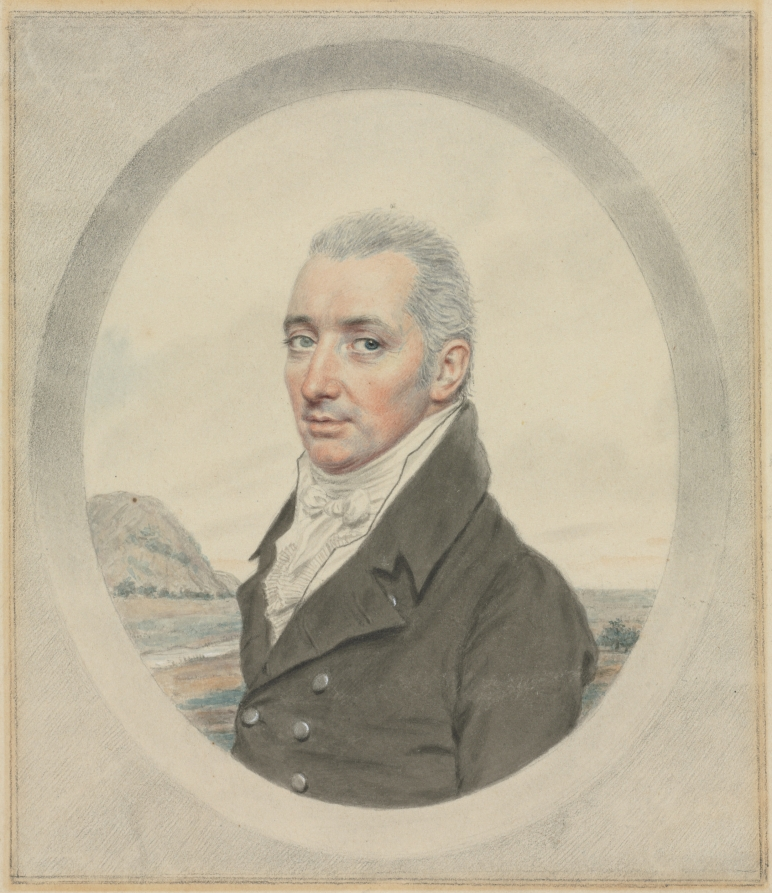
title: Portrait of General Keith MacAlister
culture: England, 18th century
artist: John I Smart (British, 1741–1811)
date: c. 1800–1810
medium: watercolor and graphite, heightened with traces of white gouache, on paper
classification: Portrait Miniature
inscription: across bottom, in graphite: Genl Macalester ; VERSO, center, in graphite: 169; lower left, in graphite: l. 159. [circled]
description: Although it is impossible to say if it was always part of the artist’s process to execute a preparatory sketch prior to painting each miniature, we do know that John Smart retained many hundreds of these sketches. A great number were inherited by his son John James Smart, who in turn left them to his daughter Mary Ann Bose. Upon her death in 1934, they were divided between three of her children: William Henry Bose, Lilian Dyer, and Mabel Annie Busteed. General MacAlister is represented in three-quarter view, bust length, and facing the right. His eyes are blue, but the right eye is clouded and lighter in color than the left. There is no sign of isolated damage or fading, confirming that this color difference was among MacAlister’s physical attributes. He wears a brown coat; white, frilled vest edged in black; tall collar; and a white cravat tied in a bow. His closely cropped hair is powdered, and an unidentified rocky landscape through which a small river runs is painted in the background; it probably represents a place of personal significance in Scotland or India, possibly even Seringapatam and the Cauvery River. Smart depicted MacAlister inside of a penciled oval tromp l’oeil frame. The drawing is replete with physically informative details and is larger and more finished than drawings intended to function exclusively as preparatory sketches, though it may also have served this purpose. Beneath the elaborate penciled border is written in large graphite script “Genl Macalester.” This inscription is not in the artist’s hand and almost certainly a later addition. A Colnaghi label was removed from the verso after the work entered the museum’s collection. The sitter is likely Major-General Keith MacAlister (1746–1820) of the Madras Cavalry. He was the eldest of three soldier brothers who served with distinction in India. MacAlister was born at Skerrinish in the Isle of Skye and ascended through the ranks rapidly following his appointment as cadet in 1777. He became captain in 1796; lieutenant-colonel in 1799; colonel in 1809; and major-general in 1812. He is celebrated particularly for his role in the 1799 storming and capture of Seringapatam, a decisive battleground in the Fourth Anglo-Mysore War, and for rescuing his brother Matthew from a long imprisonment in the same city. MacAlister was also instrumental in organizing the Madras Light Cavalry.5 Smart’s portrait of MacAlister would have been painted between 1800 and 1810, when the sitter was an older man and had returned to England before settling in Scotland. The Nelson-Atkins Museum of Art owns a Smart portrait on ivory called Keith Michael Alexander, dated 1810. Although he wears a military uniform rather than civilian clothes, the sitter is identical to the one in the Cleveland drawing—note in particular the differently colored eyes and the blue veins at the left temple. Although it was painted in 1810, possibly some years after the Cleveland sketch, the sitter’s hair loss is more pronounced in the earlier drawing. This inconsistency can be explained by the fact that Regency fashion called for men to comb their hair forward, thereby obscuring baldness, as seen here. Otherwise, the portraits are so similar that it is likely that Smart was consulting the earlier finished drawing when executing the 1810 miniature in ivory. Both “General Macalister” and “Colonel Keith Michael Alexander” are listed by Daphne Foskett among Smart’s sitters, but she reproduces images only of the latter Nelson-Atkins miniature. No additional portraits of the period depicting gentlemen of either name have been discovered at this time. The Nelson-Atkins ivory has been called Keith Michael Alexander by tradition at least since it was in the Mr. and Mrs. John W. Starr collection before entering the museum in 1958. However, the miniature has not been removed from the frame since its acquisition, and there is no evidence of an inscription. It is likely that Keith Michael Alexander is a mistaken interpretation of the name Keith MacAlister, particularly because no record of a soldier by the name of Keith Michael Alexander has been discovered.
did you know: Sketches helped John Smart work out the particulars of a portrait before commencing the miniature on ivory; they were useful in the event that a duplicate might later be required.